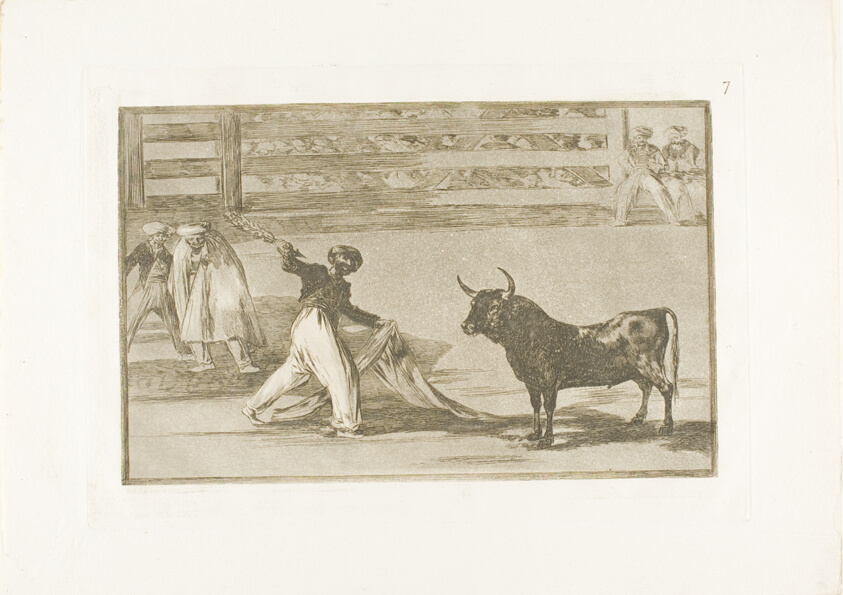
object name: Print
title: Origin of the harpoons or banderillas, plate seven from The Art of Bullfighting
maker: Francisco José de Goya y Lucientes (Spanish, 1746-1828)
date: 1814/16, published 1816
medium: Etching, burnished aquatint and burin on ivory laid paper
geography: Spain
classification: etching; print; prints and drawing